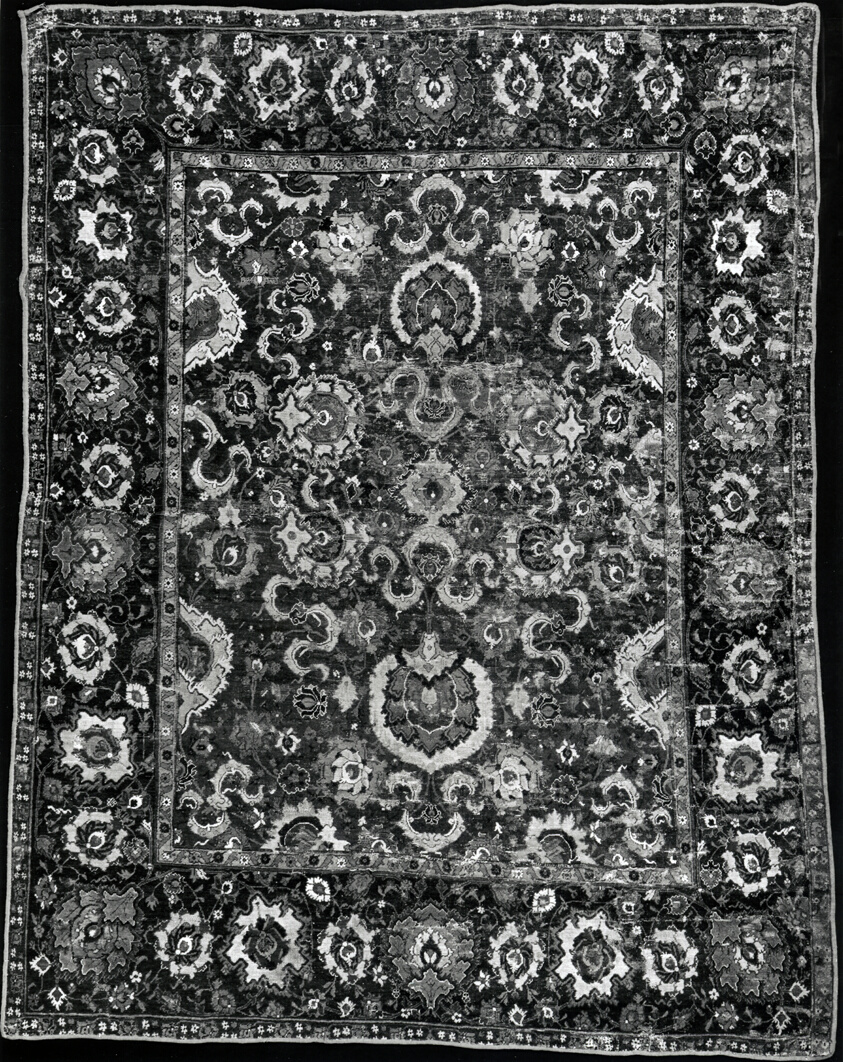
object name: Textile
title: Carpet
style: isfahan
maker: India, possibly Lahore or Abhar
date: 1675/1700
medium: Cotton, wool, silk, and gilt-metal-strip-wrapped silk, plain weave with supplementary brocading wefts and supplementary wrapping wefts forming cut pile through a technique known as "Sehna (Persian) knots;" pieced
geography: India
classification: textile; weaving - carpet